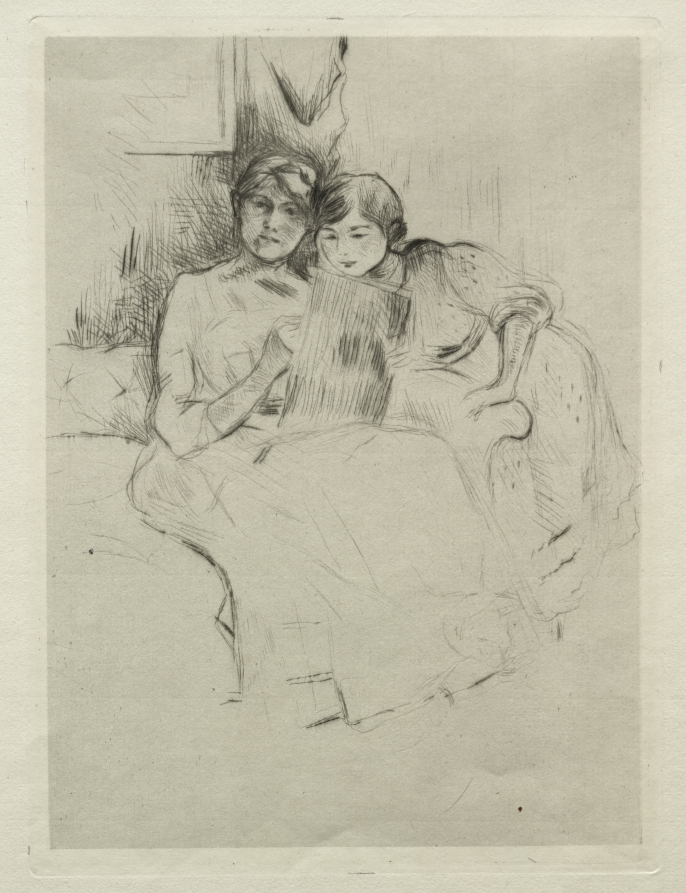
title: The Drawing Lesson (Berthe Morisot Drawing with Her Daughter)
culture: France, 19th century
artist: Berthe Morisot (French, 1841–1895)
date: 1889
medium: drypoint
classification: Print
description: Encouraged by the Impressionist Mary Cassatt and the poet Stéphane Mallarmé, Morisot experimented with printmaking between 1887 and 1889. In this drypoint, a technique in which a sharp tool is used to scratch lines onto a copper plate, Morisot looks directly at the viewer—as if drawing our portrait—while 11-year-old Julie observes her mother at work.